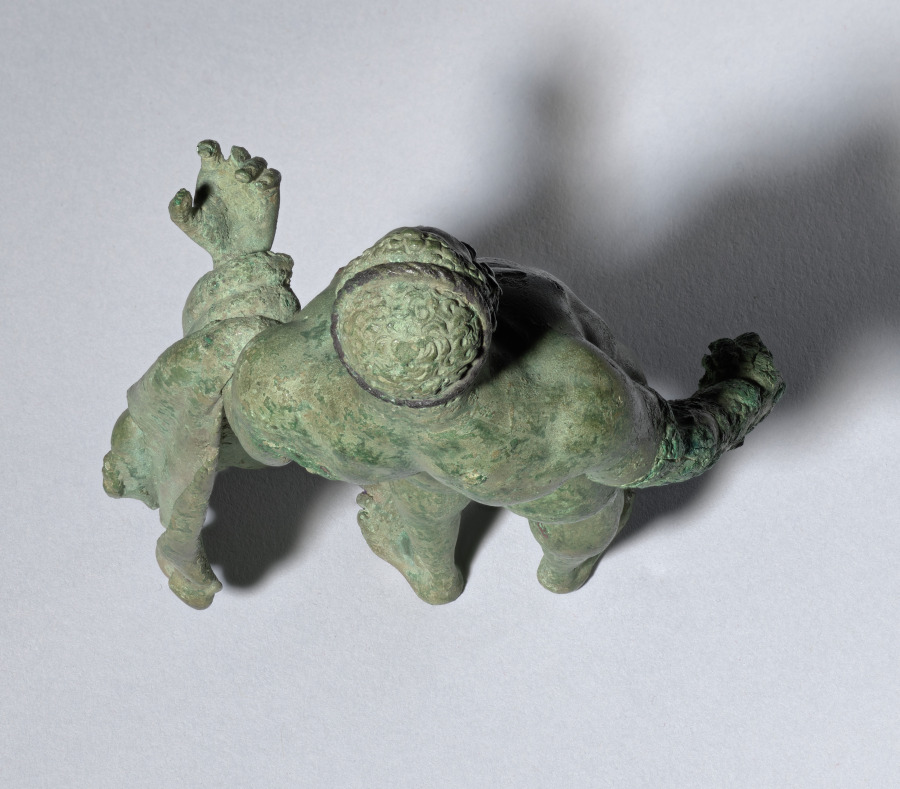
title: Hercules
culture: Italy, Rome, Early Imperial period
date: c. 30 BCE–20 CE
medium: bronze with silver and copper inlays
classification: Sculpture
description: This bronze statuette is a nude figure of the hero Hercules. He stands in a contrapposto pose, with the majority of his weight on one leg. Over his left arm, Hercules holds the skin of the Nemean Lion, having slayed the beast as part of his Twelve Labors and now carrying the pelt as a trophy. Although now mostly lost, Hercules once held his signature wooden club in his right hand. Roman artists often portrayed Hercules as middle-aged, as though greater maturity would increase his power and virility.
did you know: Hercules is the Roman name for the classical hero known in Greek as Herakles.